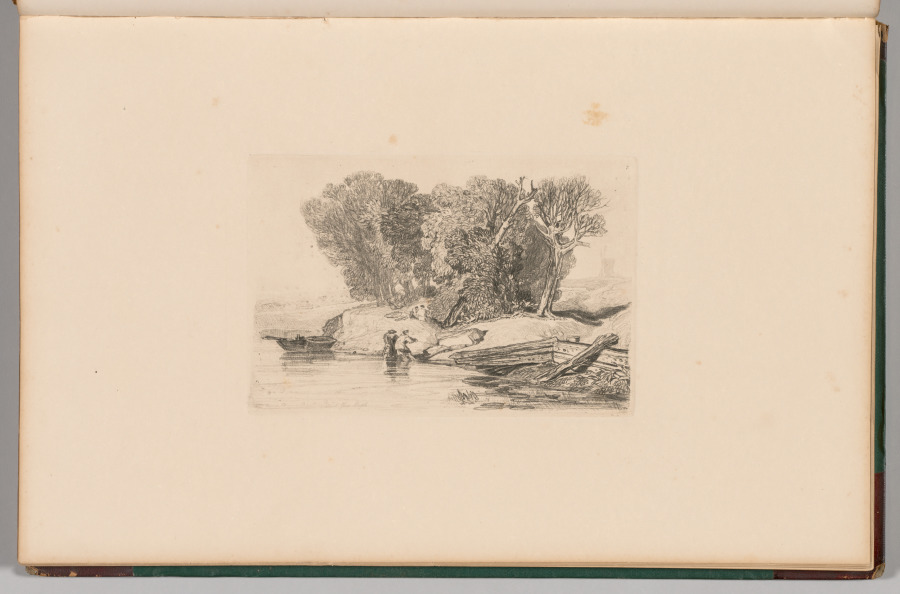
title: Liber Studiorum: Plate 7, Postwick Grove, Norfolk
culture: England, 19th century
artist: John Sell Cotman (British, 1782–1842)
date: 1838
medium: softground etching, from a bound volume containing 48 plates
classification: Bound Volume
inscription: In plate, within image, upper right: 7; in plate, below image: Postwick Grove, Norfolk